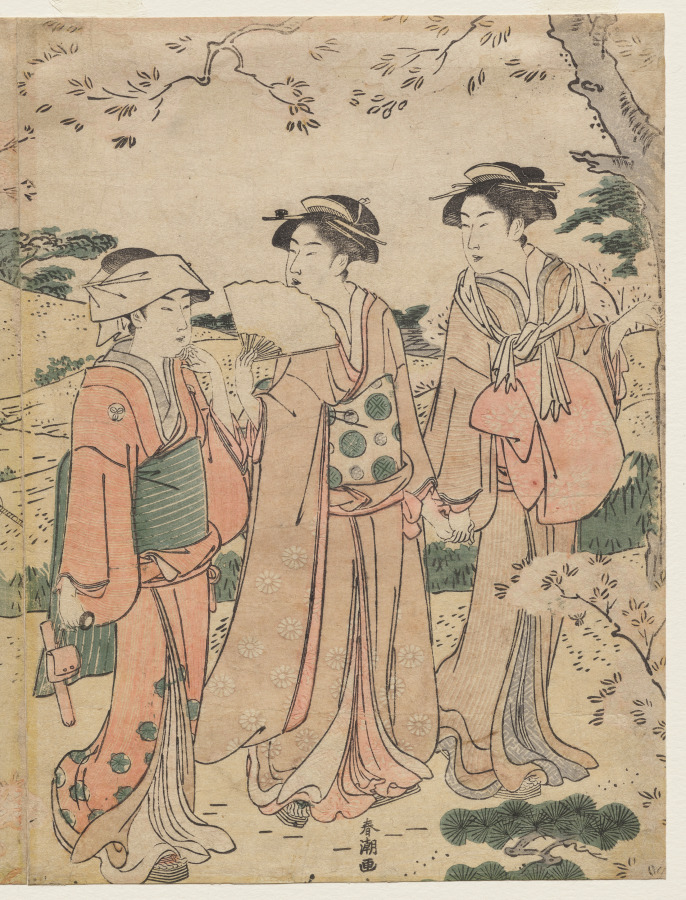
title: Women Viewing Cherry Blossoms at Asukayama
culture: Japan, Edo period (1615–1868)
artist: Katsukawa Shunchō (Japanese)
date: 1780s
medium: color woodblock print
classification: Print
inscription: Signature: Shuncho ga Publisher: Izumiya Ichibei